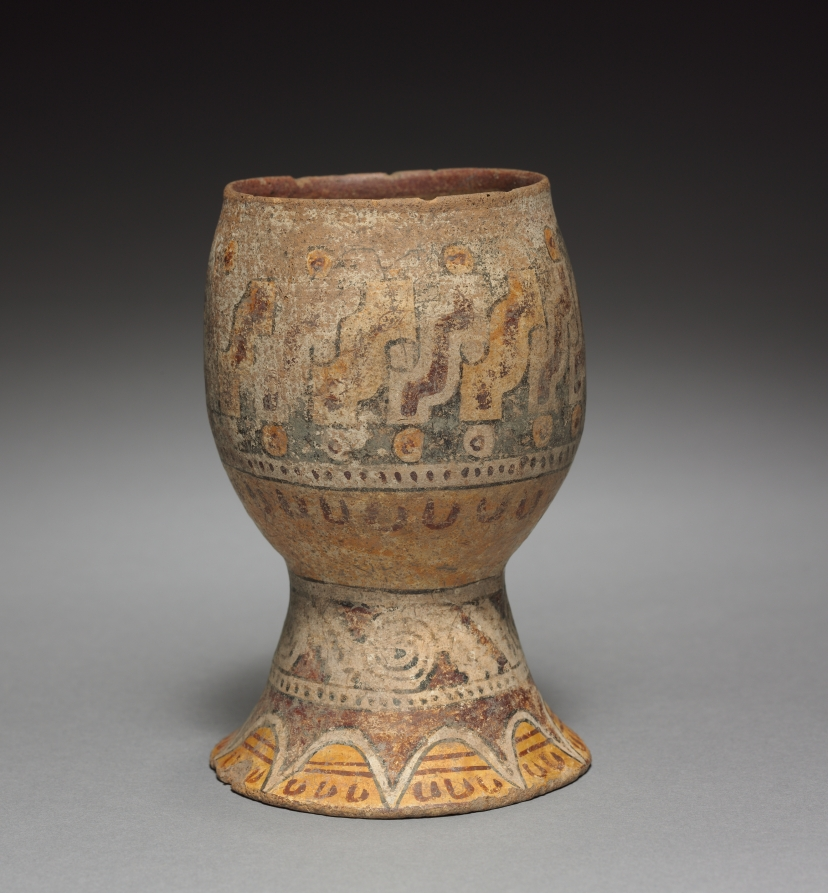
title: Drinking Cup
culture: Mexico, Cholula(?), Mixteca-Puebla style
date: 900–1519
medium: pottery with burnished, colored slips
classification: Sculpture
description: After about the year 800, several Mixtec kingdoms developed in the regions known today as Oaxaca and Puebla in southern Mexico. Mixtec artists excelled in creating small-scale, fine works of art, including polychrome pottery. A Mixtec noble may have used this well-painted goblet to drink chocolate or pulque, a fermented beverage made from the sap of the maguey cactus.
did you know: Pulque, once the drink of gods and rulers, is now available in a can.